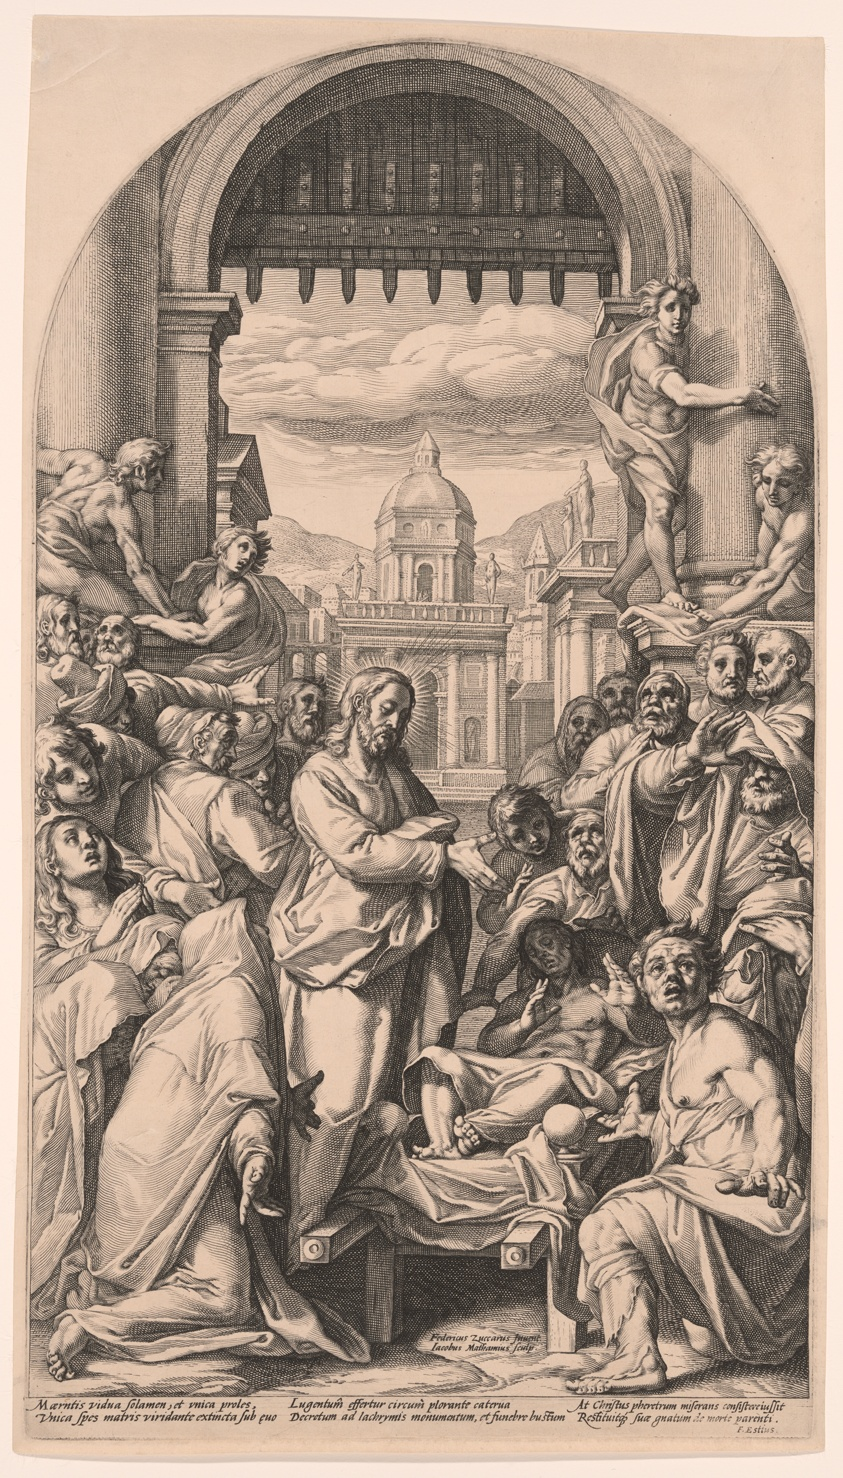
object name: Print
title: Christ Raises the Dead Son of the Widow of Nain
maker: Jacob Matham (Dutch, 1571–1631); after Federico Zuccaro (Italian, 1540/41–1609)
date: 1593/94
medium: Engraving in black on cream laid paper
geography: Netherlands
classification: prints and drawing; paper; engraving; print